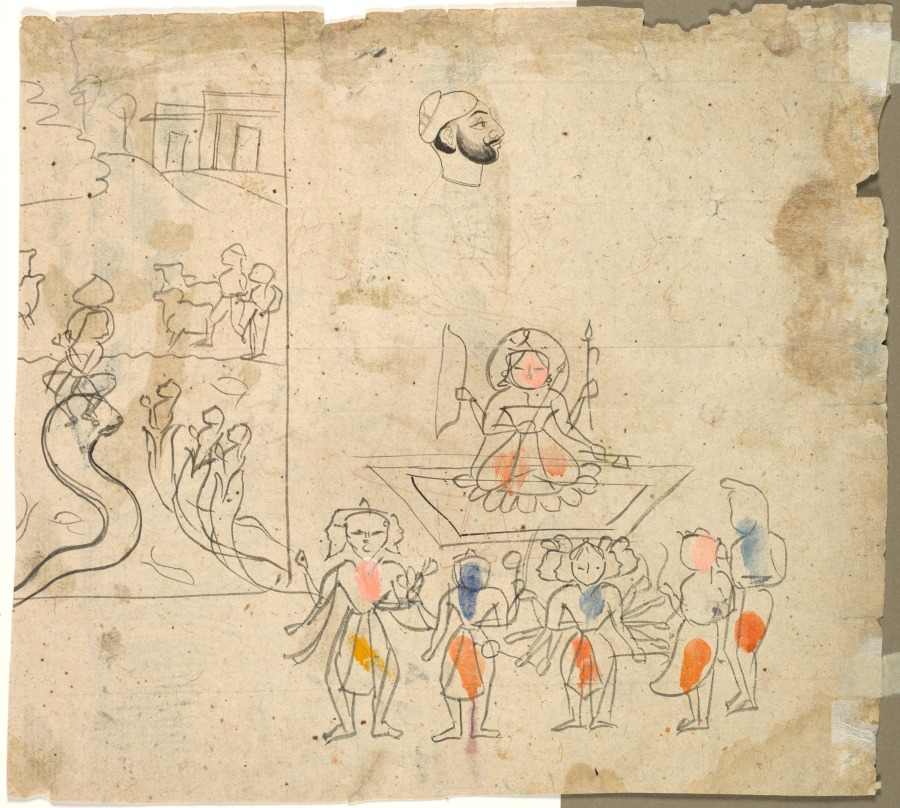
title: Ladies Shooting from a Pavilion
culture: India, Rajasthan, Kota school, 19th century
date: c. 1830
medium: graphite and watercolor on paper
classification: Drawing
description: This may be a study for the painting Ladies Shooting from a Pavilion (1955.48)